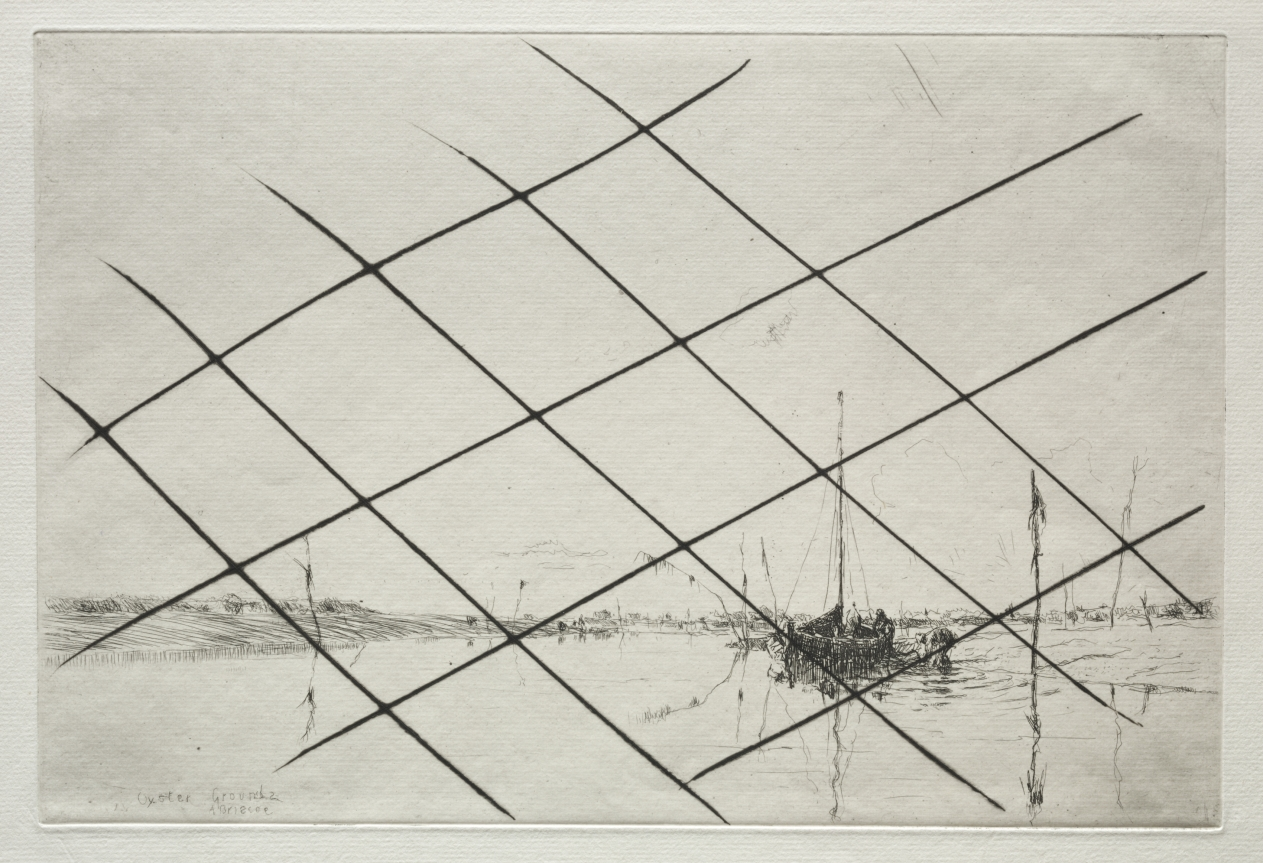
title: Oyster Grounds (On Essex Creek at Low Tide)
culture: England, 20th century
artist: Arthur John Trevor Briscoe (British, 1873–1943)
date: c. 1900–1937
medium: etching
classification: Print